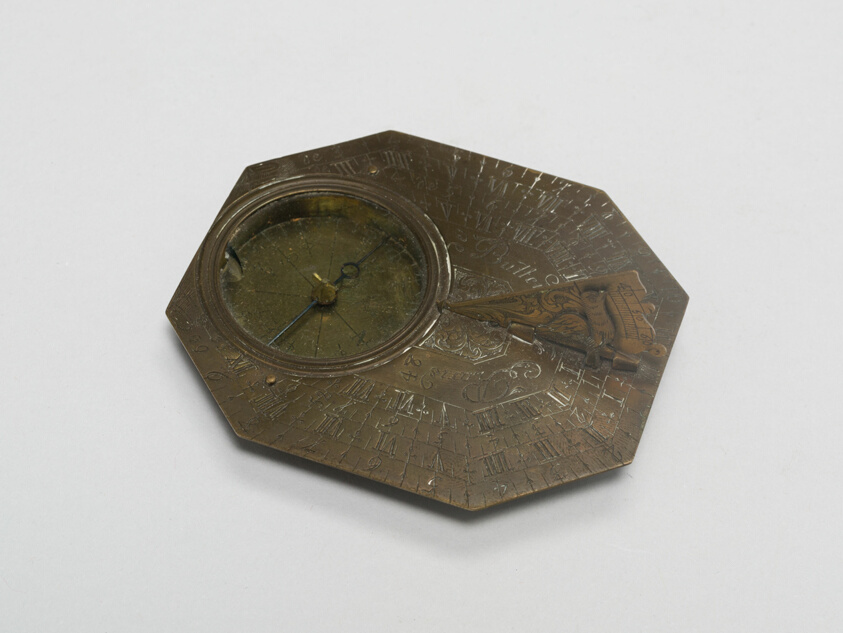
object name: Metalwork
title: Portable Sundial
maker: Michael Butterfield; English, active in Paris, 1635–c. 1724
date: 1700/25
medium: Brass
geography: France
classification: tool; european decorative arts; metalwork